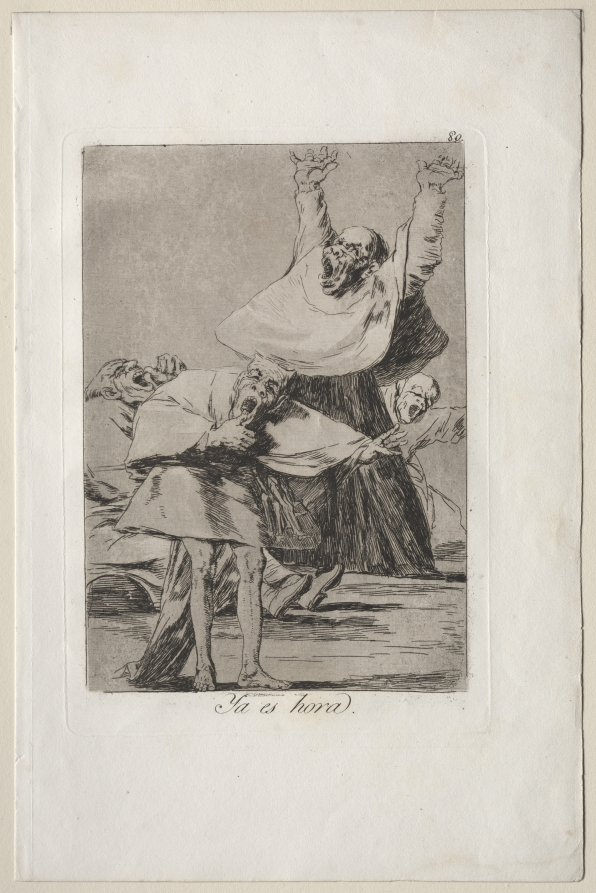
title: It is Time, Plate 80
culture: Spain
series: Los Caprichos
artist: Francisco de Goya (Spanish, 1746–1828)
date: 1799 (printed c. 1855)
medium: etching and aquatint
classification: Print